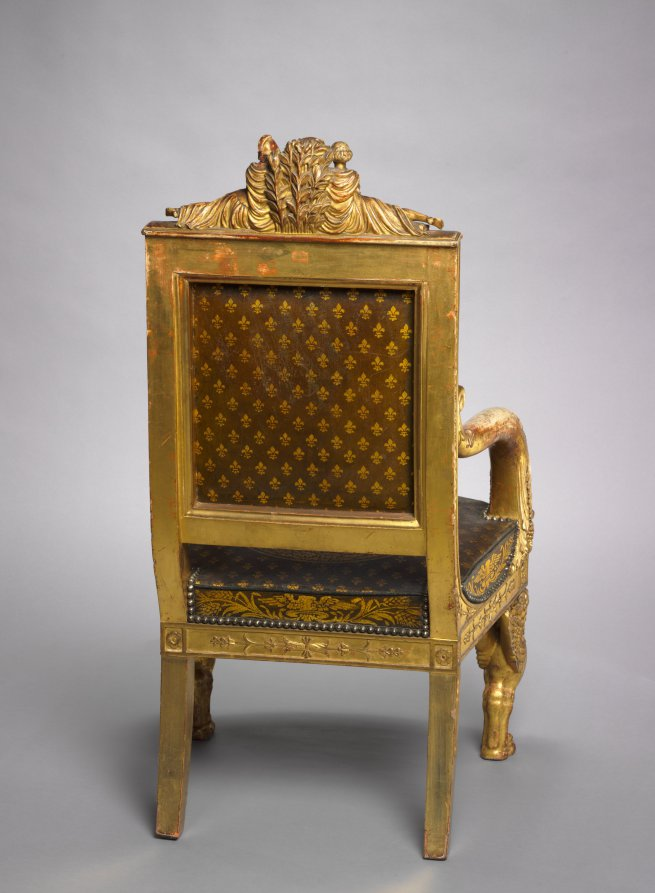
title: Child's Throne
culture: France, Paris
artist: Pierre-Marie Balny le Jeune (French, 1832)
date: 1822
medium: carved and gilded wood, leather upholstery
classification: Furniture and woodwork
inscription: inscribed with stencils inside back rail: BLONDEL TAPISSIER/RUE ST. ANTOINE N 72 1822 inscribed in ink lower edge back rail: 12 JANVIER 18[22?]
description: This chair was made for the young, presumed successor to the French throne who ruled briefly as Henri V in 1830, the last of the direct Bourbon line. He is depicted at the center of the top rail protected by female figures representing France and Minerva, the Roman goddess of wisdom. Fleurs-de-lis and the Gallic rooster, symbols of French royalty and the French people, decorate the upholstery.